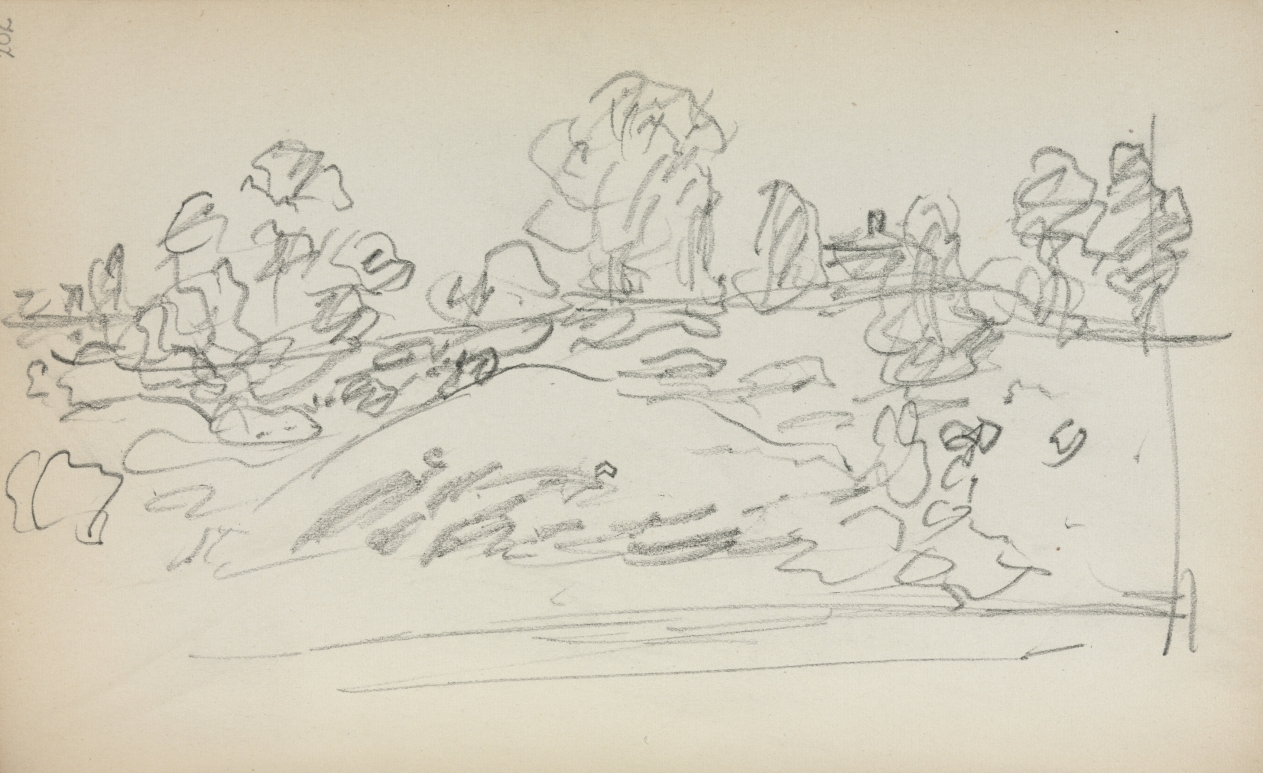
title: Italian Sketchbook: Landscape (page 202)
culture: America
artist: Maurice Prendergast (American, born Newfoundland [now Canada], 1858–1924)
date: 1898–1899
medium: pencil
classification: Bound Volume